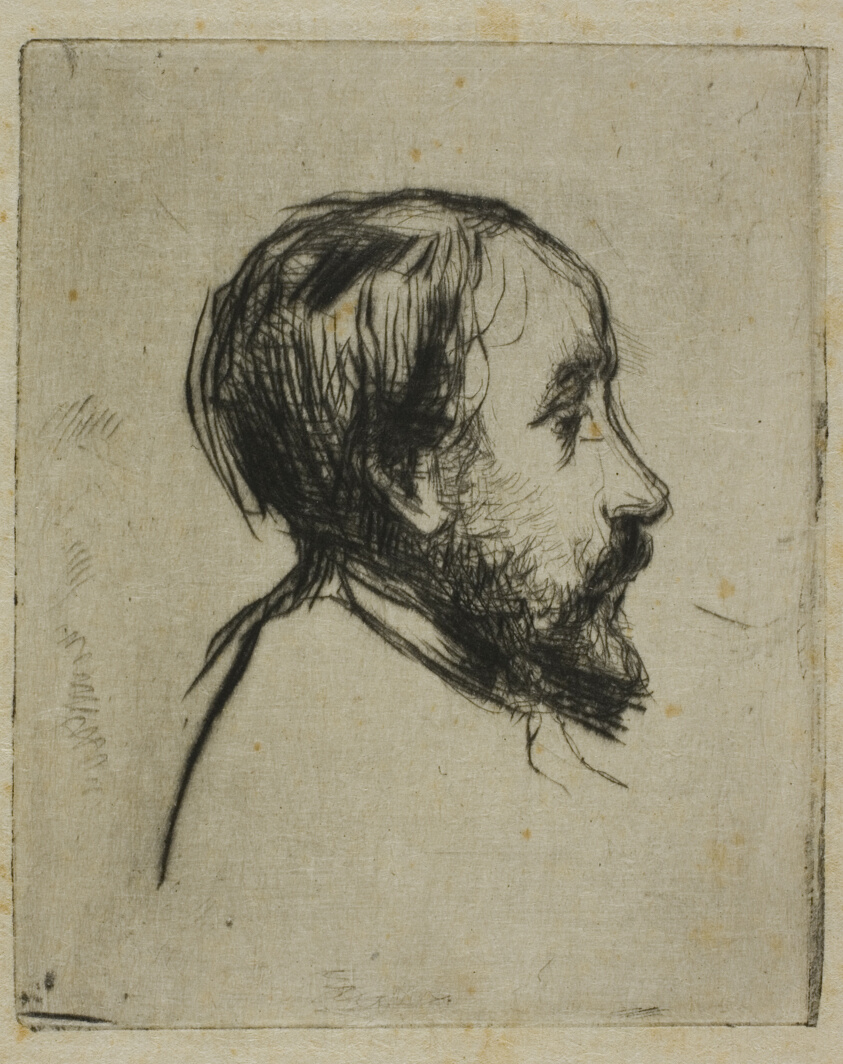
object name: Print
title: Profile Portrait of Degas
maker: Marcellin Gilbert Desboutin (French, 1823-1902); or possibly by Giuseppe de Nittis (Italian, 1845/46-1884)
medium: Drypoint and plate tone on cream Japanese paper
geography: France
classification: drypoint; print; prints and drawing